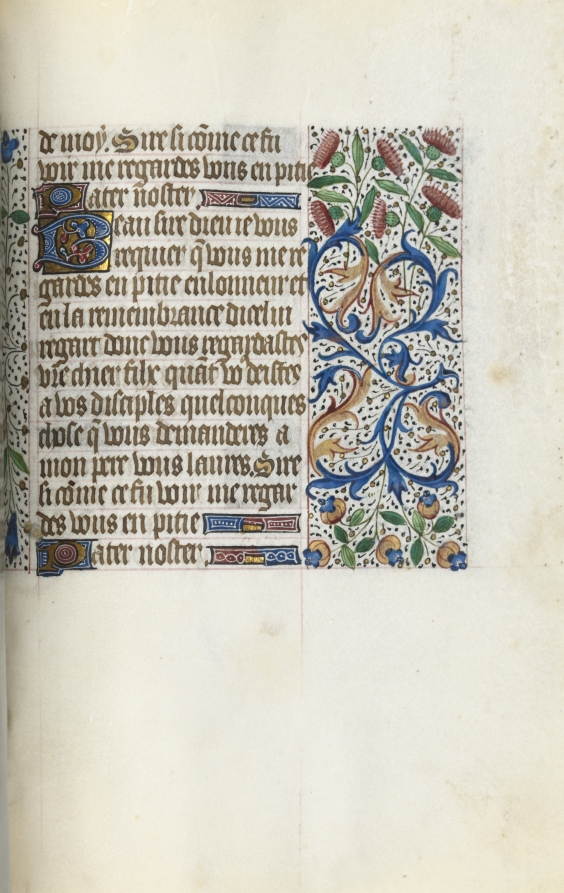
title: Book of Hours (Use of Rouen): fol. 153r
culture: France, Rouen, 15th century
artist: Master of the Geneva Latini (French, active Rouen, 1460–80)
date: c. 1470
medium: ink, tempera, and gold on vellum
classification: Bound Volume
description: In the late 1400s and early 1500s Rouen was an established and important center of book production. The city’s cathedral had a wealthy chapter that spent large sums of money to commission books and to maintain its extensive library. The stationers and booksellers would have likely been concentrated in or near the cathedral precinct. This artist, named after a manuscript now in Geneva, was Rouen’s principal illuminator during the second half of the 1400s.